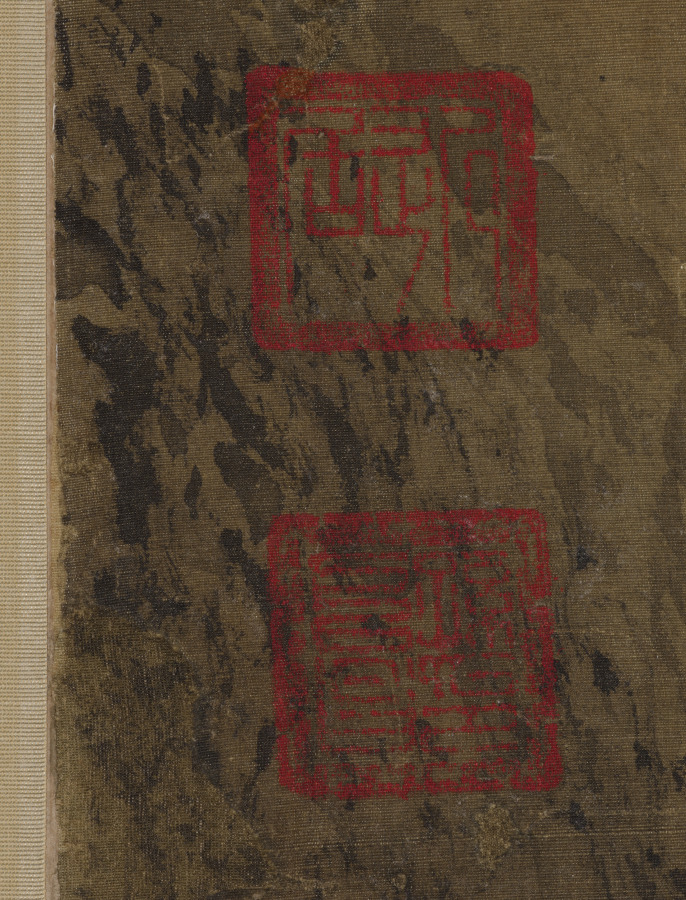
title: Road to Shu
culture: China, Qing dynasty (1644–1911), Qianlong reign (1736–95)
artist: Yuan Yao (Chinese, active mid-1700s)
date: 1743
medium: Hanging scroll; ink and color on silk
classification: Painting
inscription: artist's seals: yuan yao shi yin 袁耀 之印, zhao dao shi 昭道 氏 two collector’s seals: jin ju and illegible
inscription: Shu han xinglü //shi guihai xia //Hanshang Yuan Yao hua// 蜀椷行旅时癸亥夏- 邗上 袁耀 画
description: Few works by the Yuan workshops in Yangzhou present a continuous composition of such monumental scale as this hanging scroll. Road to Shu (in Sichuan province) depicts the trade of goods over long distances and through mountainous terrain. Busy travelers lead mules over footbridges, mountain paths wind along steep slopes, and soaring bridges connect peaks divided by deep gorges. The Yuan studios produced paintings to decorate the residences of wealthy Yangzhou salt merchants and princely palaces. The title Road to Shu refers to the historical drama of the flight of Tang emperor Xuanzong (reigned 712–56) to Sichuan in the aftermath of the An Lushan Rebellion (755–63). At the same time, the scenery alludes to Anhui, the mountainous native country of many of the salt merchants and their trade routes in northern parts of the empire.